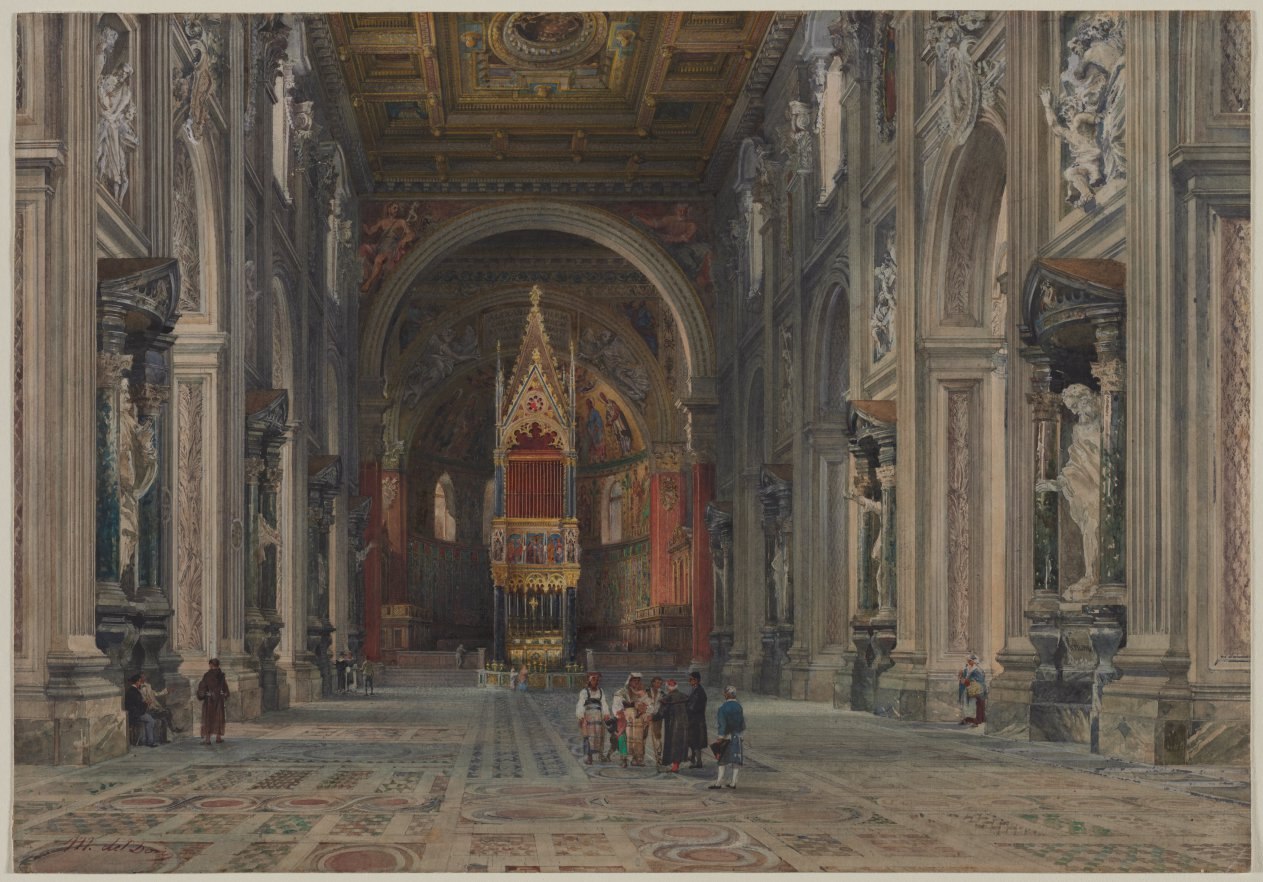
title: Interior of San Giovanni in Laterano, Rome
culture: Italy, 19th century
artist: Martino del Don (Italian)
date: c. 1896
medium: watercolor, brush and brown, gray, and black wash, and gouache with lead white, over graphite (ruled)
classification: Drawing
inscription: signed, lower left, in brown wash: M. del Don ; by artist, center, in yellow-brown wash: ALEXAND[ER] VILPM / LABANTI IDEM / REPARA NAVIT / ANNO XIII ; by artist, lower right, in black wash: S. FILIPPO ; VERSO, upper left, in graphite: no number ; upper right and center right, in graphite: 7199 [backwards, sideways, underlined] / [illegible] [backwards, sideways] [illegible] [backwards, sideways, crossed out] ; lower center, in graphite: mount this [underlined twice] / Hatford [illegible] size [sideways, underlined]